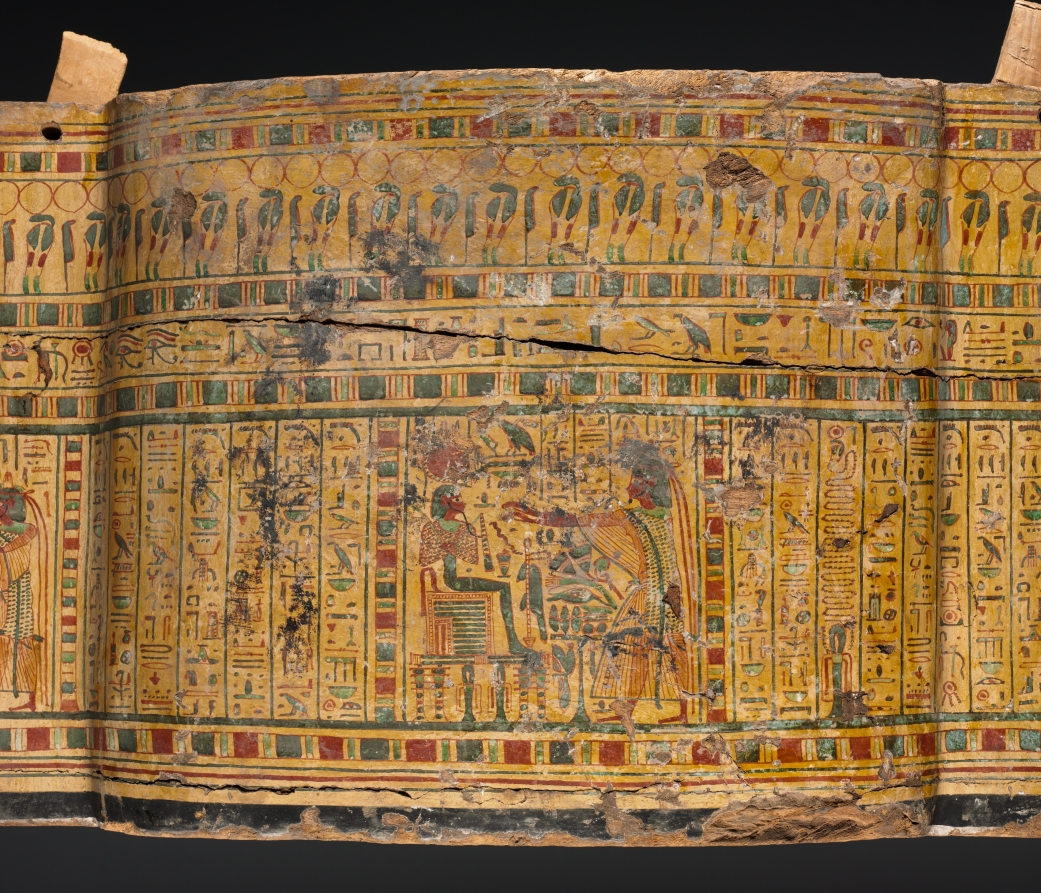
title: Coffin of Nesykhonsu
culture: Egypt, Thebes, Third Intermediate (1069–715 BCE), Dynasties 21–22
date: c. 976–889 BCE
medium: gessoed and painted sycamore fig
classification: Funerary Equipment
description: Egyptian coffins told stories and illustrated spells to help the deceased transition safely to the afterlife. Inside Nesykhonsu's coffin there are two jackals, one facing right and the other left, near the top. Here, the jackal represents the powerful deity Anubis, the god of the afterlife and embalming.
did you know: Two of Nesykhonsu's titles, "Lady of the House" and "Singer of the Choir of Mut the Great," are written on the outside of the coffin.